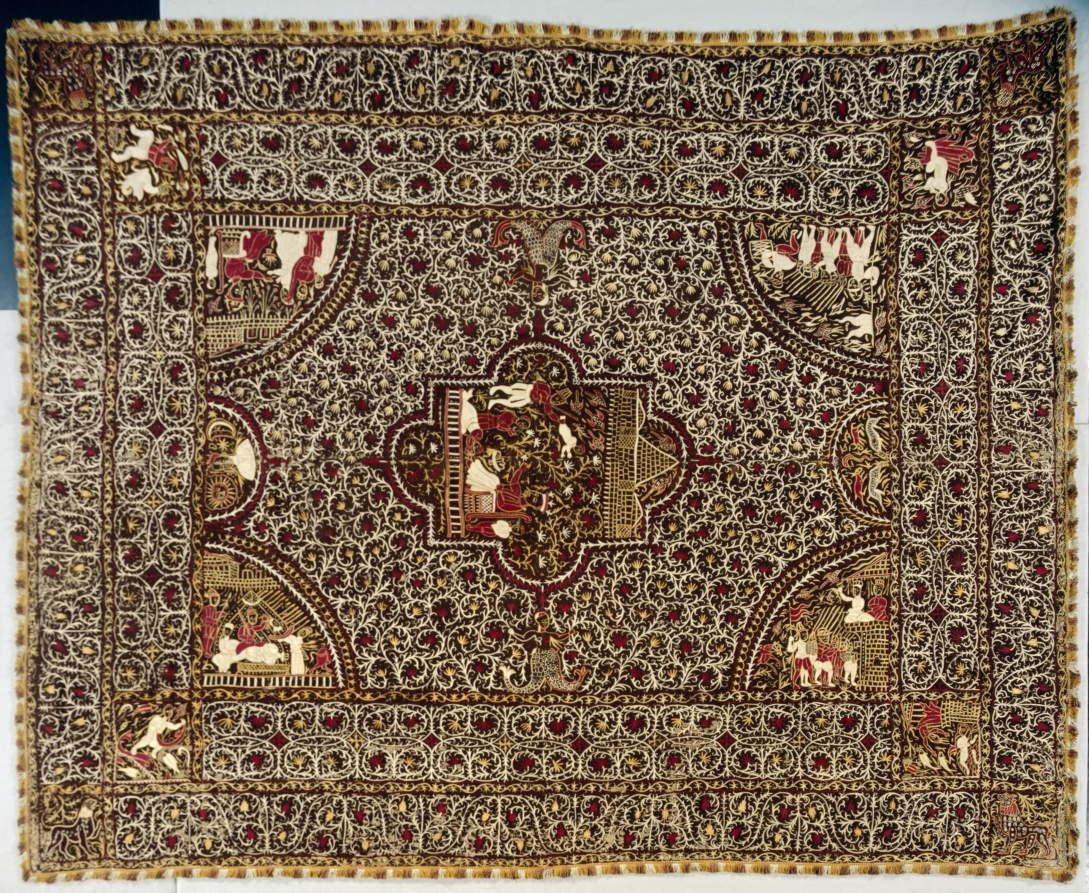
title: Bedspread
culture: India, Goa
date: 1600s–1700s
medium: Silk on cotton; embroidery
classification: Embroidery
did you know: The design features biblical scenes with Indian mythological characters and Portuguese-costumed figures embroidered in chain stitch.